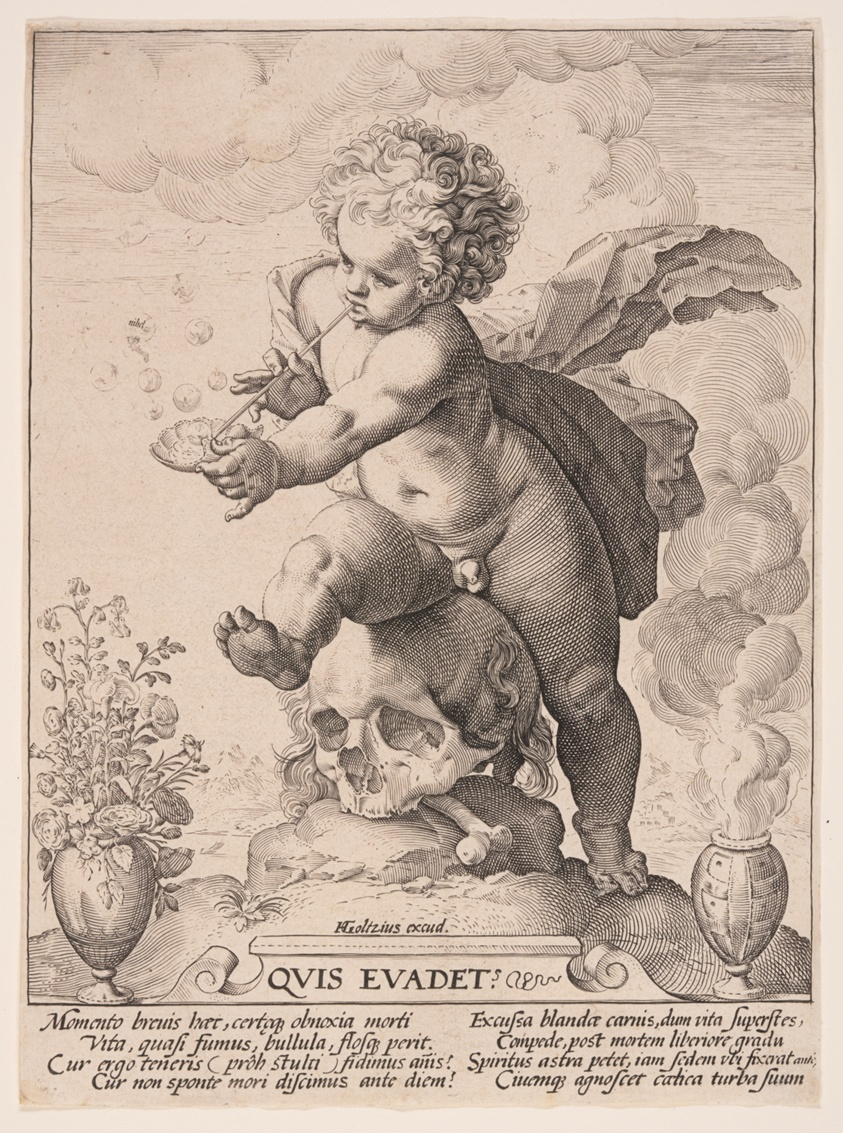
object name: Print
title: Allegory of Transience (Quis Evadet?)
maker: Workshop of Hendrick Goltzius; Dutch, 1558–1617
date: c. 1590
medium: Engraving on laid paper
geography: Netherlands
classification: print; engraving; paper; prints and drawing